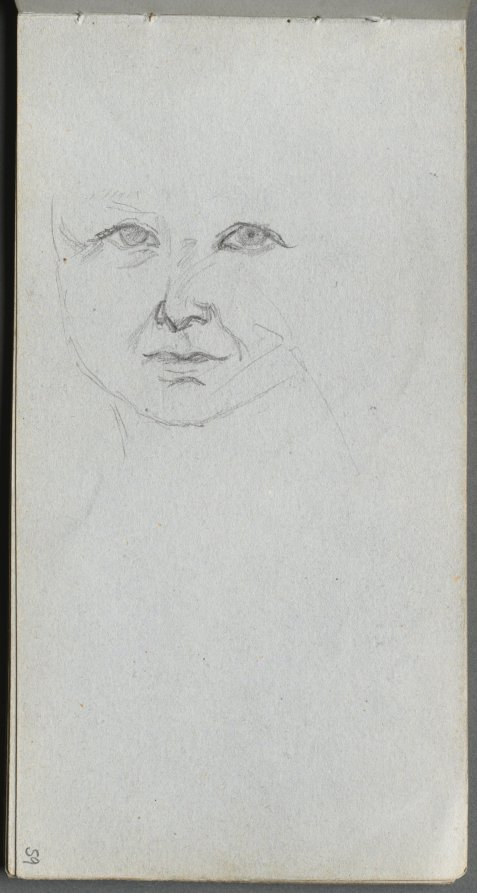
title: Sketchbook, page 59: Study of a Face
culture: France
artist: Ernest Meissonier (French, 1815–1891)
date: c. 1860s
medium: graphite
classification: Bound Volume